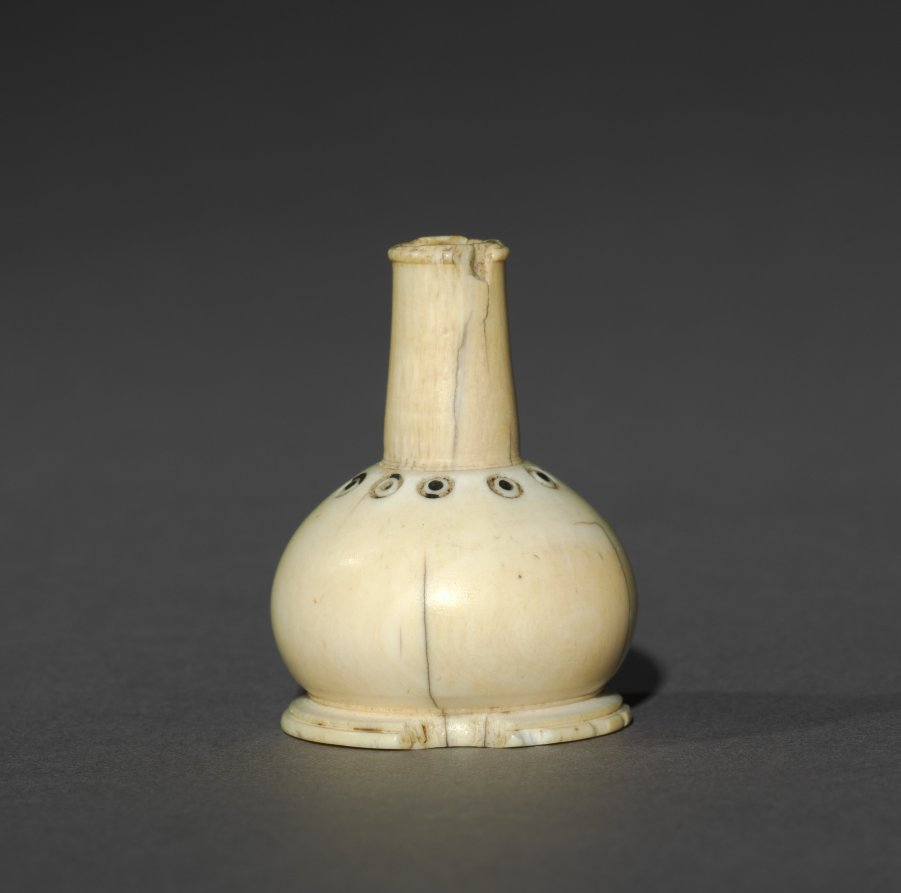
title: Miniature Vase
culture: Iran, early Islamic period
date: 700–900s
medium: ivory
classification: Ivory